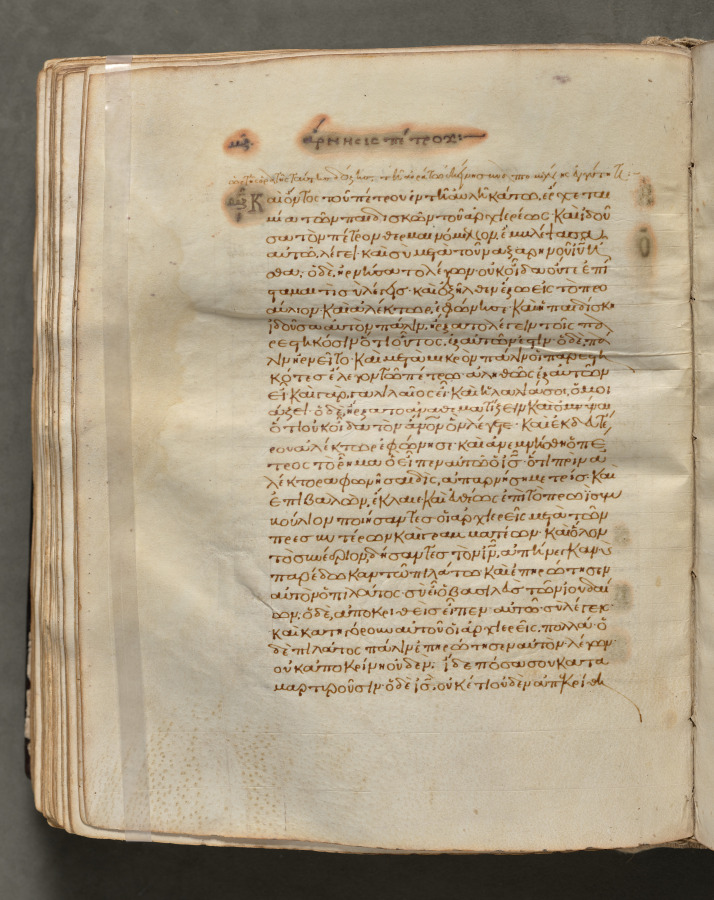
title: Text, folio 192 (verso), from a Gospel Book with Commentaries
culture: Byzantium, Constantinople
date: c. 1000–1100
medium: ink, tempera, and gold on vellum; leather binding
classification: Bound Volume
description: Each of the four gospels in this book opens on a page with brilliantly illuminated borders depicting the author of the text as well as birds-principally peacocks, symbols of the immortality of the soul-and fountains, representing the fountain of life and the salvation of the soul. This volume consists of 428 leaves with texts in Greek. Its level of sophistication suggests that it was probably written and decorated in a monastery in Constantinople.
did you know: Gospel Books were carried in procession through Byzantine churches.